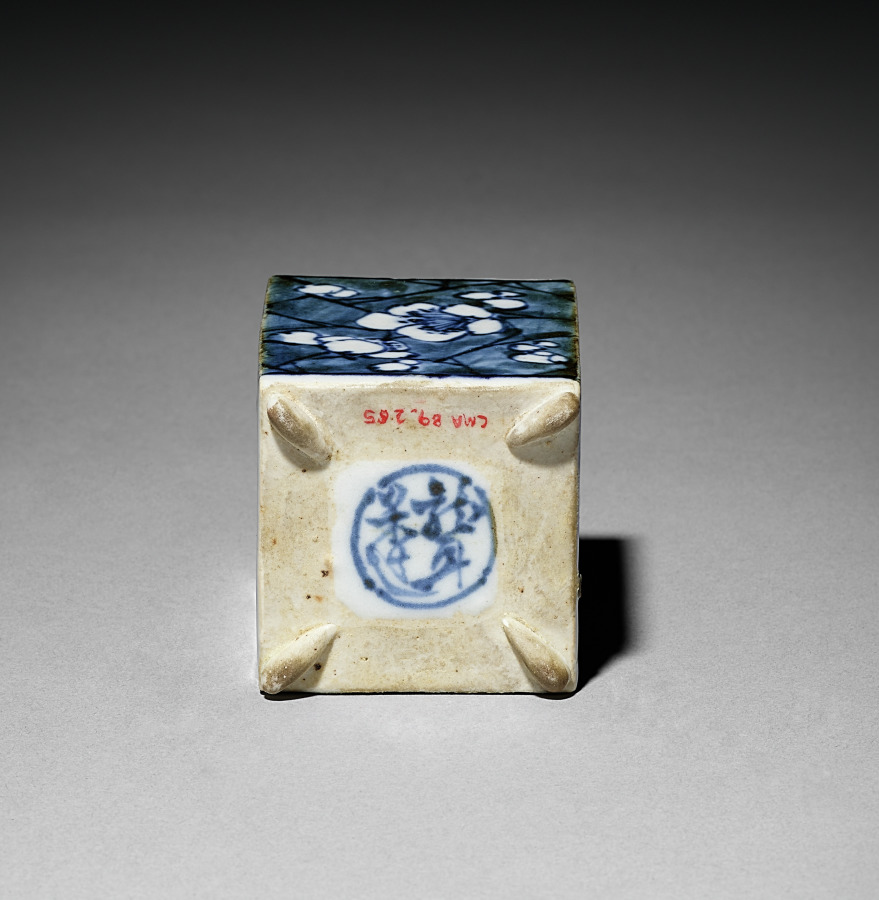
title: Tea Container with Plum Blossoms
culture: Japan, Edo period (1615–1868)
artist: Aoki Mokubei (Japanese, 1767–1833)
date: early 1800s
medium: porcelain with underglaze blue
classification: Ceramic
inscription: signed "Ro Mokubei" on base in underglaze blue.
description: Aoki Mokubei, born into a family of restaurateurs, was a potter, calligrapher, painter, and scholar, and is considered one of the three masters of later Edo period Kyoto ceramics. He specialized in porcelains fashioned after Chinese prototypes, and created works for steeped tea (sencha) such as these matching tea caddies decorated in an underglaze blue called sometsuke—literally “with applied dye.” He signed them on their bottoms. They also have intricately patterned silk sleeves to both beautify and protect them. On the exterior of the lid of the outer wooden box that contains them, it is written that Mokubei inscribed and painted an image on the box. On the interior of the lid, the signature and seals of a former owner are written. Mokubei has signed the lid of the inner box, and a charming ink and light color composition of West Lake in Hangzhou in China covers its three sides. On the fourth side is a long inscription by Mokubei describing the scene.